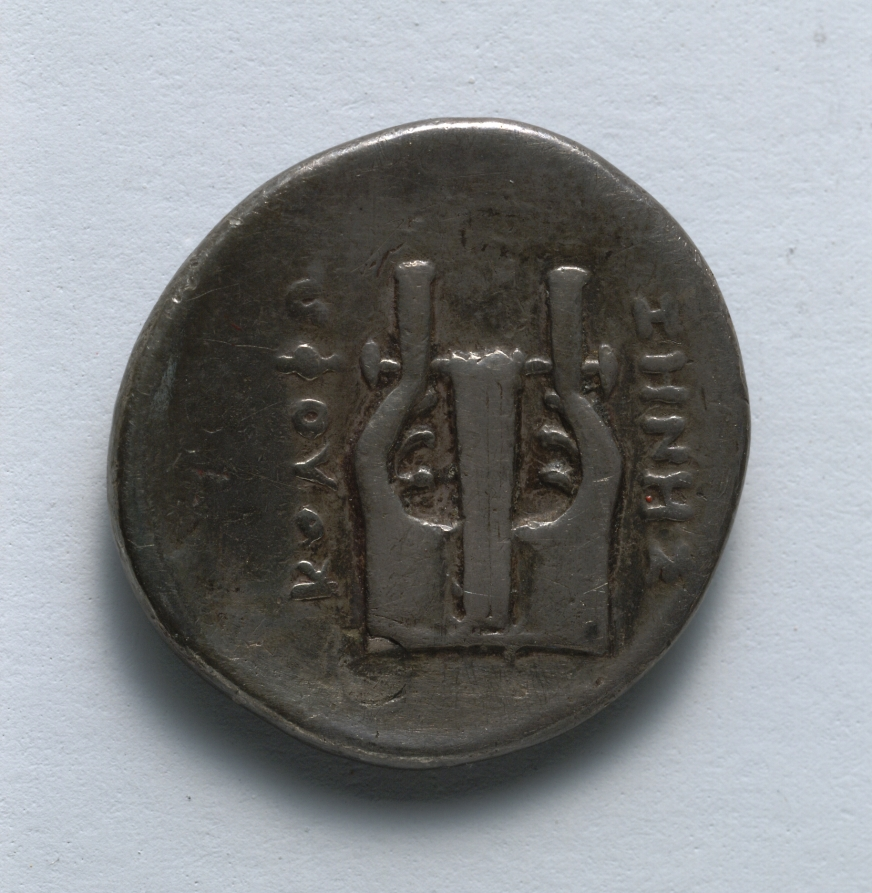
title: Drachm: Lyre (reverse)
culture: Greek, minted at Kolophon (Ionia)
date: c. 389–350 BCE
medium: silver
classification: Coins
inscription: ΙΗΝΗΣ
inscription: ΚΟΛΟΦΩ